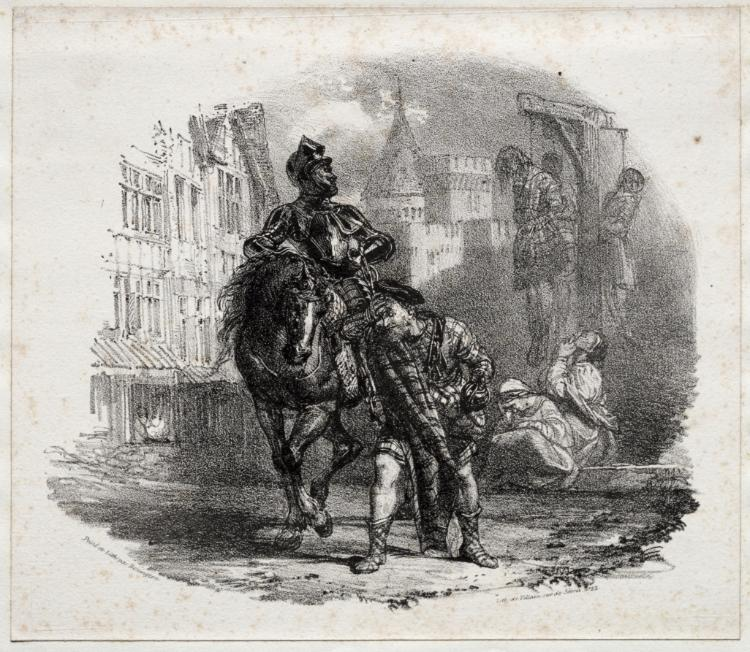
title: The Escape from Argyle Castle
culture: England, 19th century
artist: Richard Parkes Bonington (British, 1802–1828)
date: 1826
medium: lithograph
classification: Print